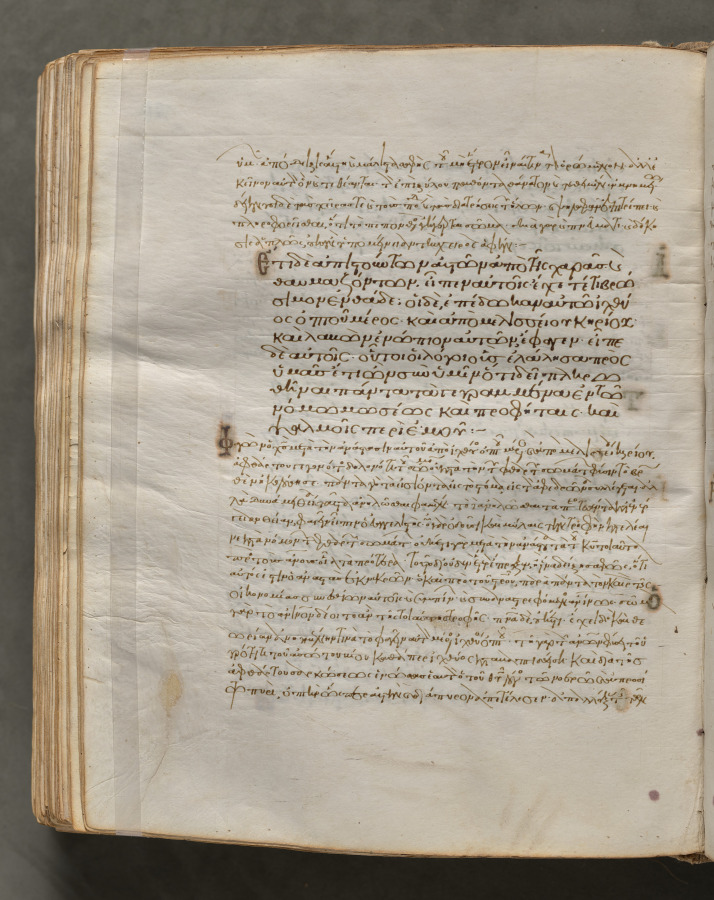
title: Text, folio 321 (verso), from a Gospel Book with Commentaries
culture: Byzantium, Constantinople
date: c. 1000–1100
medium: ink, tempera, and gold on vellum; leather binding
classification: Bound Volume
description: Each of the four gospels in this book opens on a page with brilliantly illuminated borders depicting the author of the text as well as birds—principally peacocks, symbols of the immortality of the soul—and fountains, representing the fountain of life and the salvation of the soul. This volume consists of 428 leaves with texts in Greek. Its level of sophistication suggests that it was probably written and decorated in a monastery in Constantinople.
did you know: Gospel books were carried in procession through Byzantine churches.